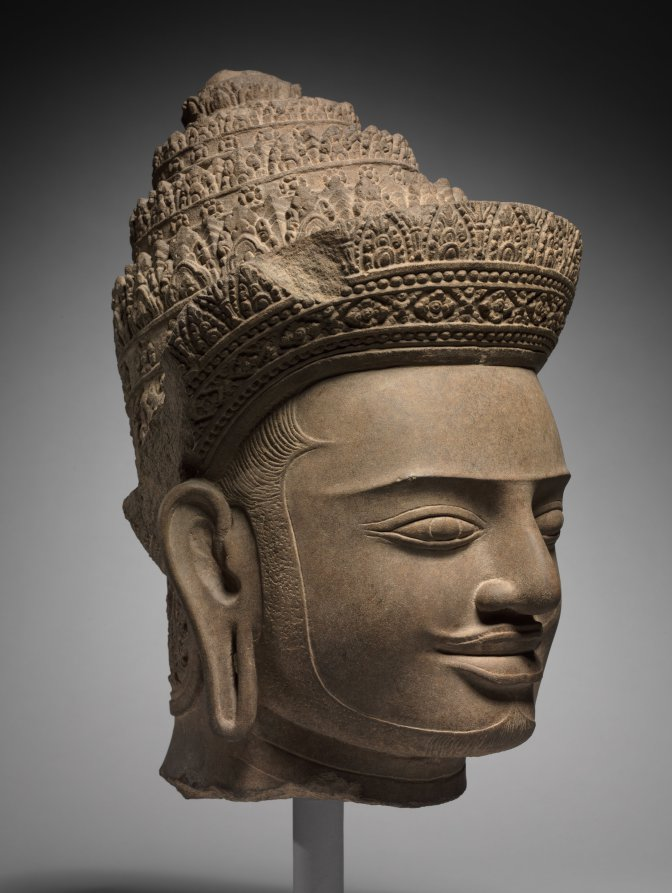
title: Head of a Deity or a Deified King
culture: Cambodia, Koh Ker, Reign of Jayavarman IV, 928-941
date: mid-900s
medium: sandstone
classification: Sculpture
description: The diadem is depicted tied to the intricate tiered headdress worn only by a god or king. Without further attributes, the identity cannot be known. Khmer sculptors of the 10th century emphasized powerful forms and extroverted expressions. The incised pupils suggest that this sculpture underwent the ritual of awakening, in which the eyes were added last. The royal head on the left is from a temple dedicated to Shiva, which was established by the Khmer king Jayavarman IV (928–942) in his remote capital of Koh Ker, 100 miles north of Angkor.